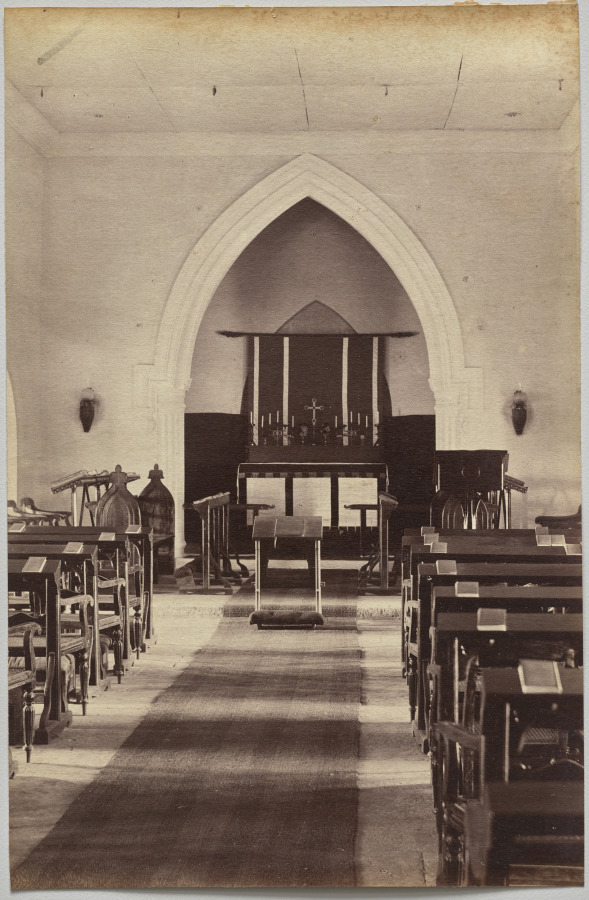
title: Interior of Church, Neemuch (recto, right)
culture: India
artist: Raja Deen Dayal (Indian, 1844–1905)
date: c. 1882–87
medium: albumen print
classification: Photograph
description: These photographs are part of an album, now disassembled, of around 105 photographs taken in India between 1885 and summer 1887 that provide glimpses into the lives of the British colonial elite and royal and upper-class Indians. The museum holds another group of 37 pictures from this album (2016.266), which was probably commissioned by a British civil servant visiting or working in India around 1888 as a personal souvenir of his experiences there.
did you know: Raja Deen Dayal is regarded now, and was considered during his lifetime, to be India’s most important 19th-century photographer.